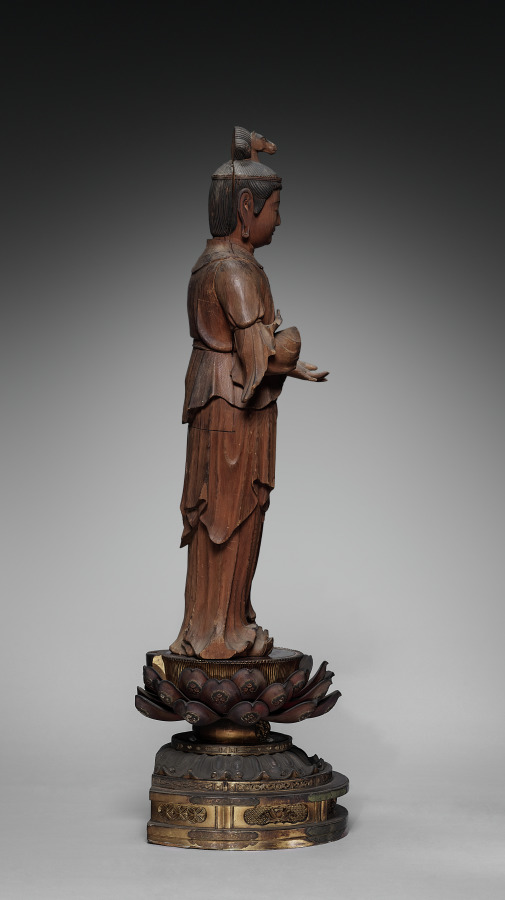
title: Batō (Horse-Headed) Kannon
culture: Japan, Kamakura period (1185–1333)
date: early 1300s, pedestal 1600s–1700s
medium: Wood with traces of color and gold; pedestal: wood with lacquer, color, and gold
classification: Sculpture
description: Batō Kannon, or Hayagriva Avalokiteshvara in Sanskrit, is the “horse-headed” form of the bodhisattva of compassion, who presides over the realm of animals in the Buddhist Six Realms of Transmigration (rebirth). A horse’s head appears in the hair of this sculpture to identify it. Bodhisattvas are beings who, though enlightened, choose to remain within the worlds of existence to help others. The six realms are heaven, hell, human, animal, hungry ghost, and ashura, or fierce supernatural entities.